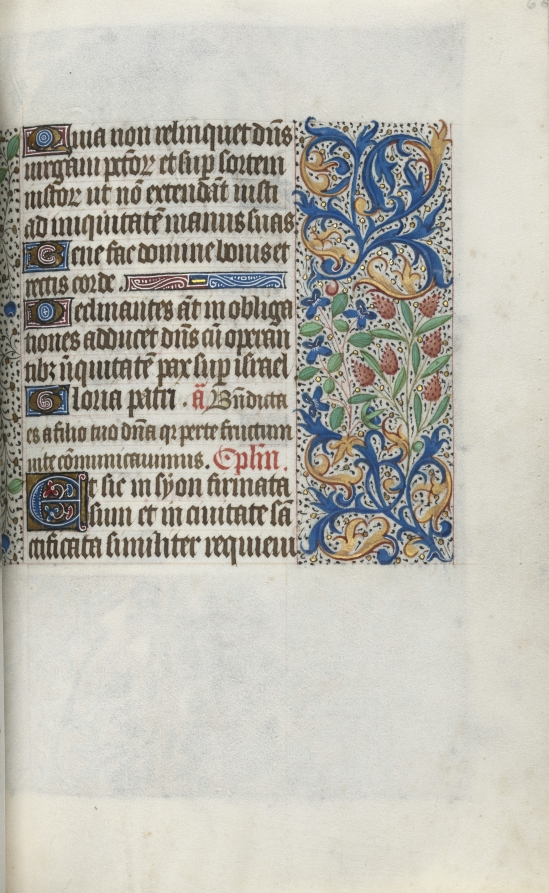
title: Book of Hours (Use of Rouen): fol. 66r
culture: France, Rouen, 15th century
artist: Master of the Geneva Latini (French, active Rouen, 1460–80)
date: c. 1470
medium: ink, tempera, and gold on vellum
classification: Bound Volume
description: In the late 1400s and early 1500s Rouen was an established and important center of book production. The city’s cathedral had a wealthy chapter that spent large sums of money to commission books and to maintain its extensive library. The stationers and booksellers would have likely been concentrated in or near the cathedral precinct. This artist, named after a manuscript now in Geneva, was Rouen’s principal illuminator during the second half of the 1400s.